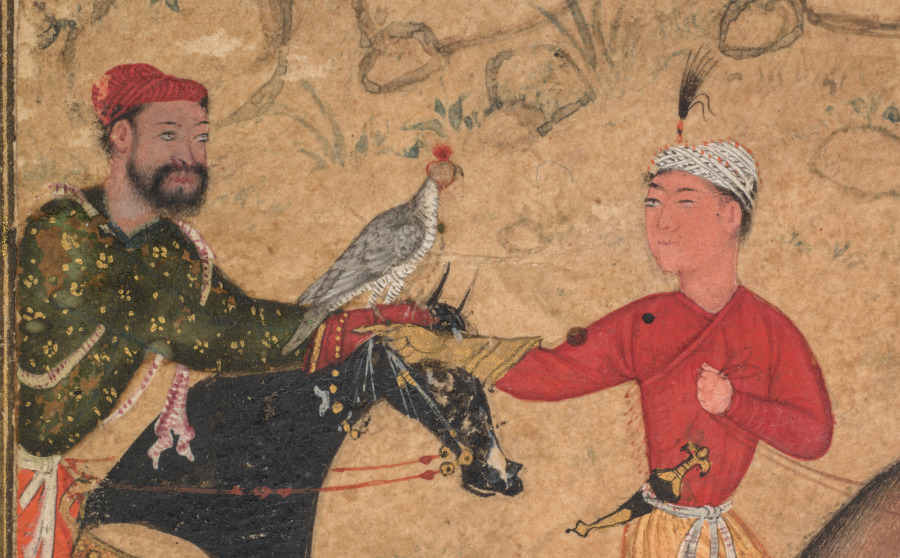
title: Hunting with falcons in a landscape (recto)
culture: Mughal India, court of Akbar (reigned 1556–1605)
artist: attributed to Abd al-Samad (Persian, c. 1510–1600)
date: c. 1558–60; borders added probably 1700s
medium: Gum tempera, ink, and gold on paper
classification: Painting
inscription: Inscription in upper right in nasta‘liq script, probably during the 1700s: the work of Mir Sayyid Ali, the illustrator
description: Mughal princes hunted on horseback with falcons. The hunting party would ride out into the wild and flush the prey from the brush. Then, its hood removed, the falcon would chase the prey and bring it down. This important work is thought to have been painted by one of the Persian artists Akbar’s father brought to India from Iran shortly after his arrival in India. The delicacy of the diminutive figures and the gently modeled rocks of the arid landscape contrast to the boldly dynamic paintings made by Indian artists.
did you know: The hunter’s glove is on the ground, as he pulls his falcon off the duck.